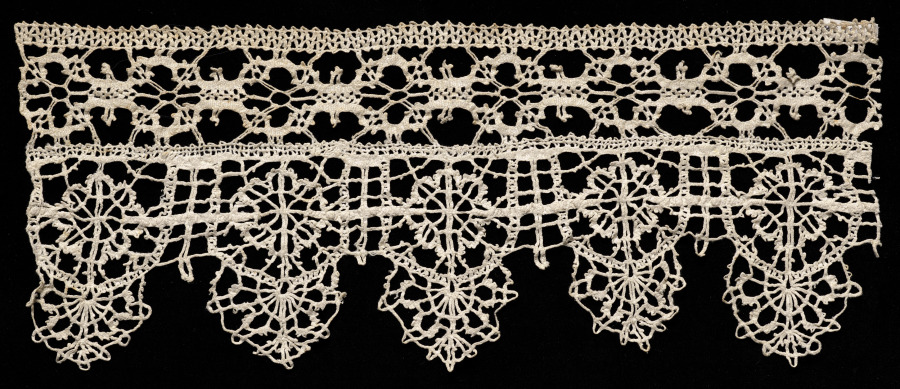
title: Lace Insertion and Points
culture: Italy, Venice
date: 1600–1640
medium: Bobbin lace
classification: Lace